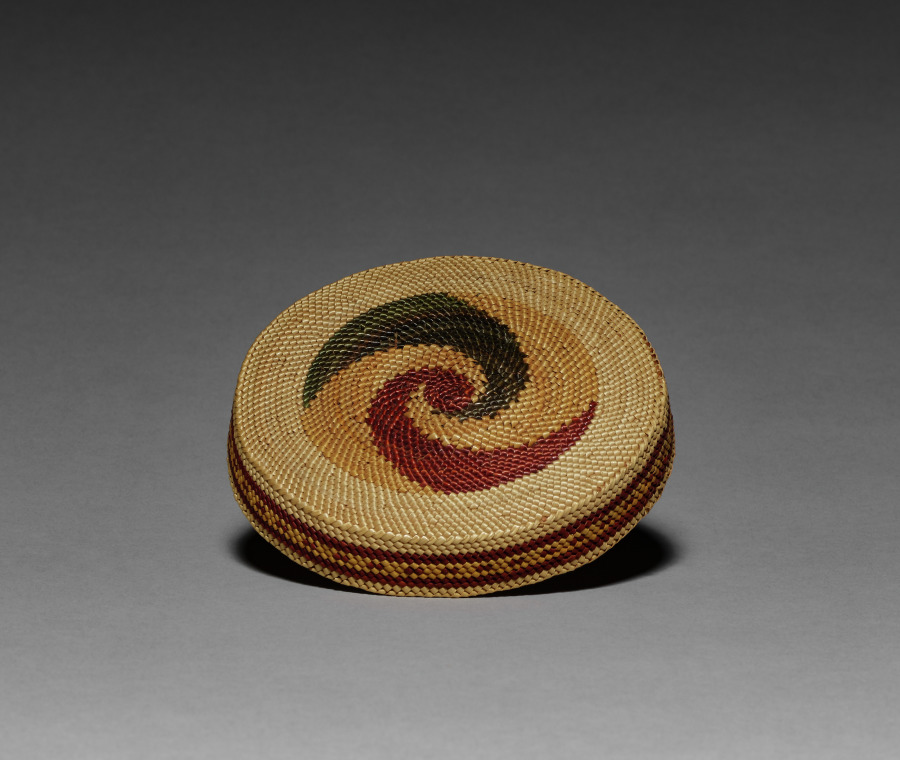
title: Cover for a Bowl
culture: Northwest Coast, Makah, late 19th-early 20th century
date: c. 1875–1925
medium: twined grasses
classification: Basketry